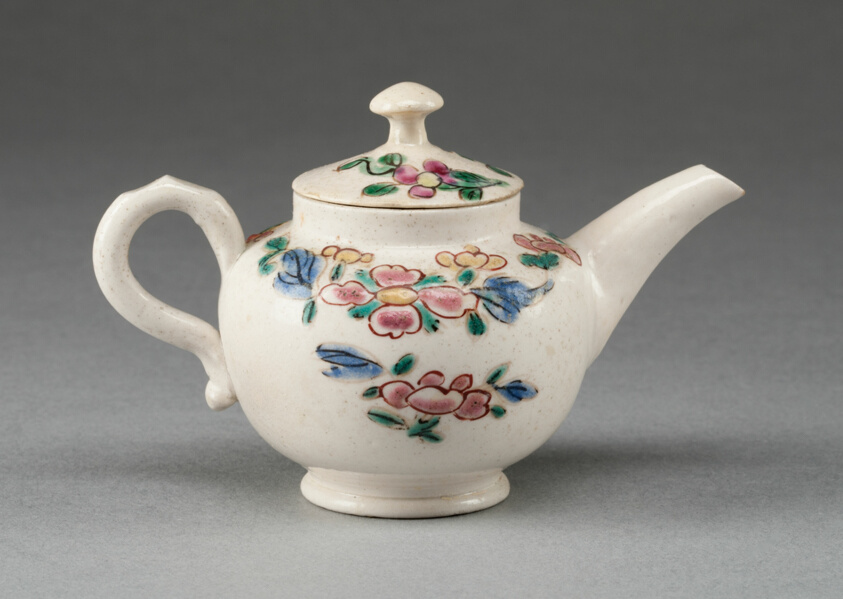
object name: Ceramics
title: Miniature Teapot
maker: Staffordshire, England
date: 1760/69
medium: Salt-glazed stoneware, polychrome enamels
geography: Staffordshire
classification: teapot; salt-glazed stoneware; european decorative arts; pottery; stoneware; ceramics